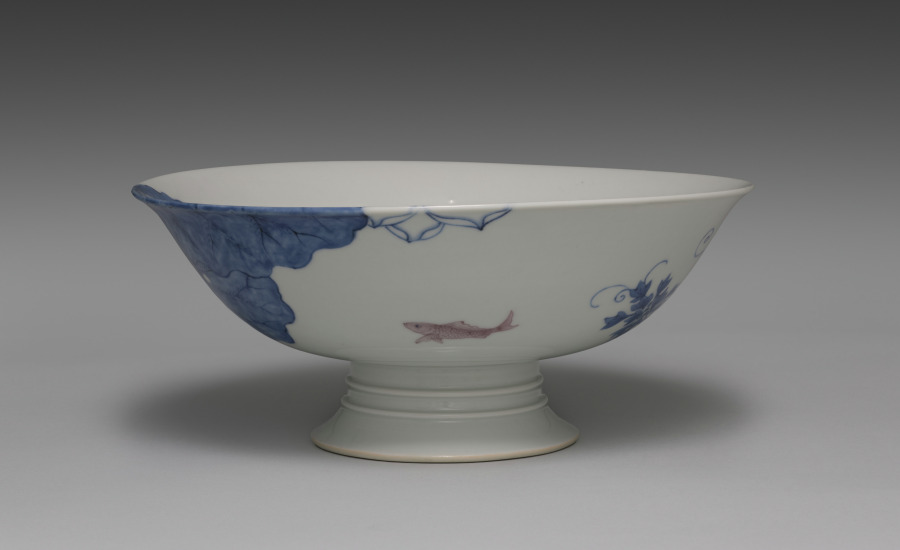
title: High-Footed Bowl with Lotus Pond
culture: Japan, Meiji period (1868–1912)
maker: Seifū Yohei III (Japanese, 1851–1914)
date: 1887–92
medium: Porcelain with underglaze color and modeled designs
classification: Ceramic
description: Seifū Yohei III was the most prominent head of a ceramics studio in Kyoto that specialized in Chinese-style porcelains and especially items for use in sencha (煎茶), or the drinking of steeped-leaf tea with companions. Sencha was popular among the bunjin of Kyoto and Osaka, who often enjoyed it as part of their emulation of Chinese culture. While sencha was by design less formal than the Japanese tea ceremony, it still featured the display of treasured objects. Prized Chinese antiquities were generally unobtainable, so substitutes such as the Gu-Shaped Flower Vase, CMA 2022.224, were much in demand. Bowls for distributing sweets, like this one, were also a staple of sencha gatherings.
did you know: This high-footed bowl simulates exploration of a pond both from underwater and from the sky.